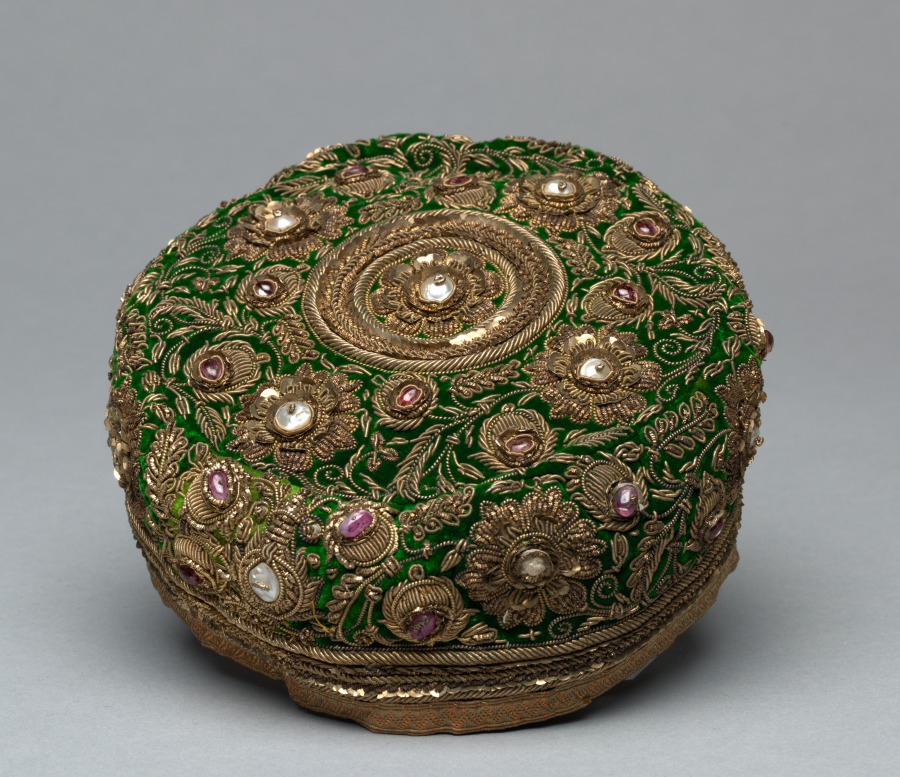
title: Cap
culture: India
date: 1800s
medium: Velvet embroidered with gilt-silver–wrapped silk thread (zari); silk: lining; rubies, pearls, and spinels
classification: Garment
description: Historically in India, head coverings were worn in outdoor and formal contexts and can signal age, allegiance, and status among Indian men and boys. A low round cap such as this was worn primarily by the well-educated aristocratic boys in the king’s circle. The painstaking process of creating the ornament involved wrapping gilt-silver wire of various dimensions around a silk thread core to create a textured appearance for the flowers and vines.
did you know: The semiprecious rose-colored spinels were considered a talisman for military victory.